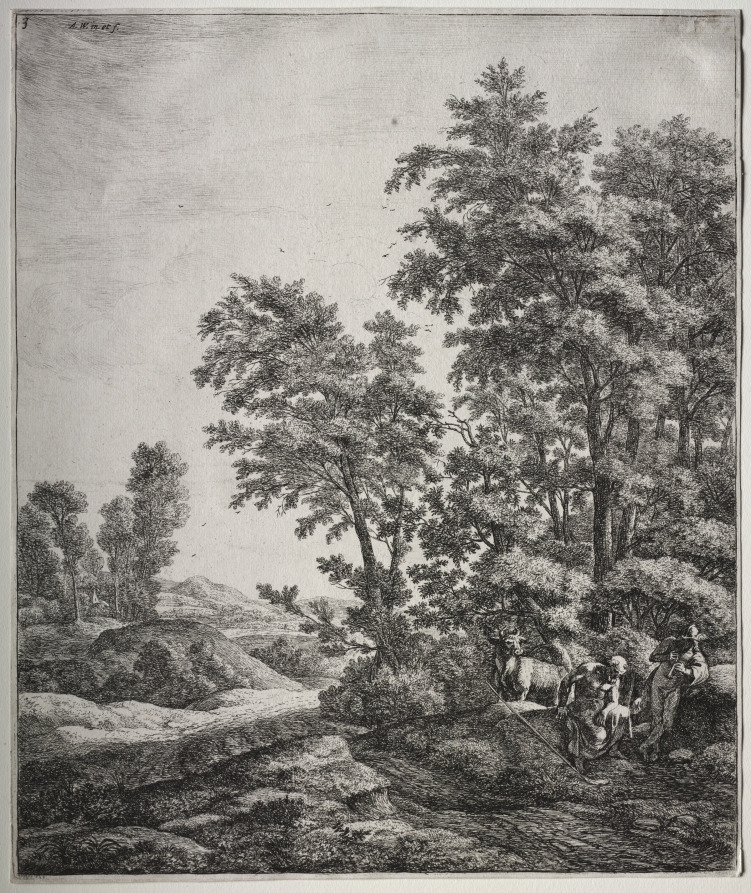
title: Six large upright landscapes with scenes from Ovid's Metamorphoses: Mercury and Argus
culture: Netherlands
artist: Anthonie Waterloo (Dutch, 1609/10–1690)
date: 1640–90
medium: etching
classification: Print